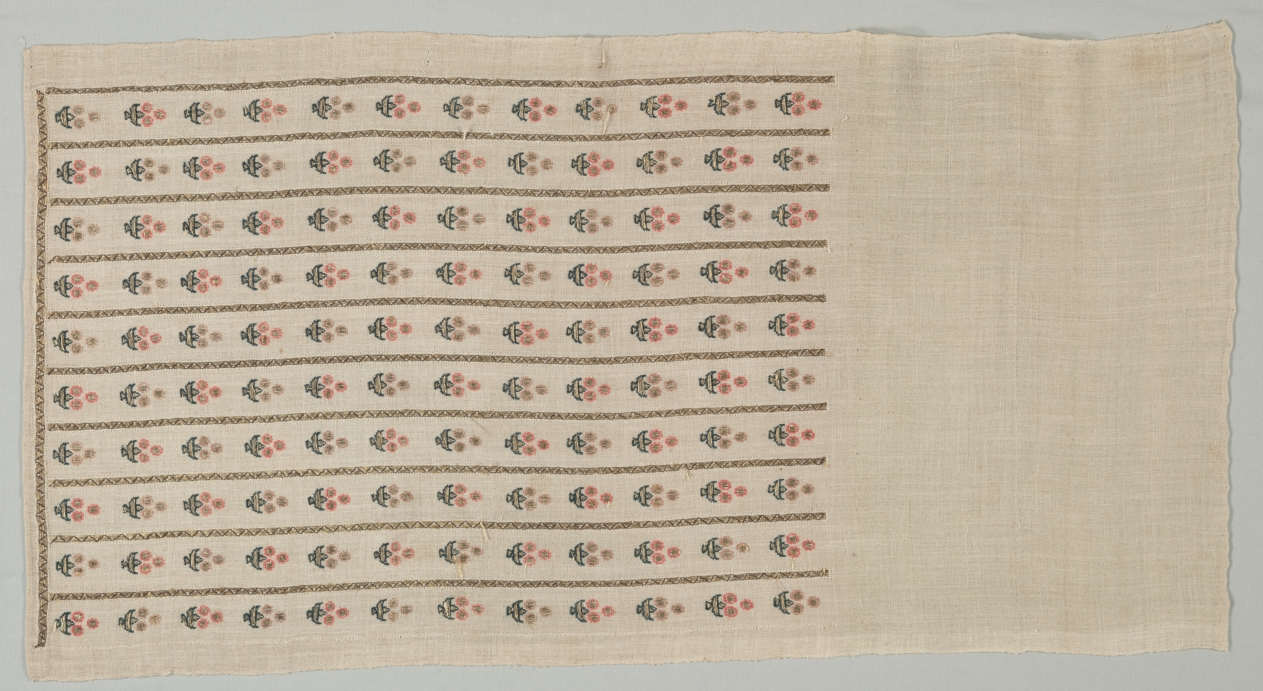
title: Embroidered Towel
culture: Turkey, 19th century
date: 19th century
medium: embroidery; silk and gold filé on linen tabby ground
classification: Embroidery